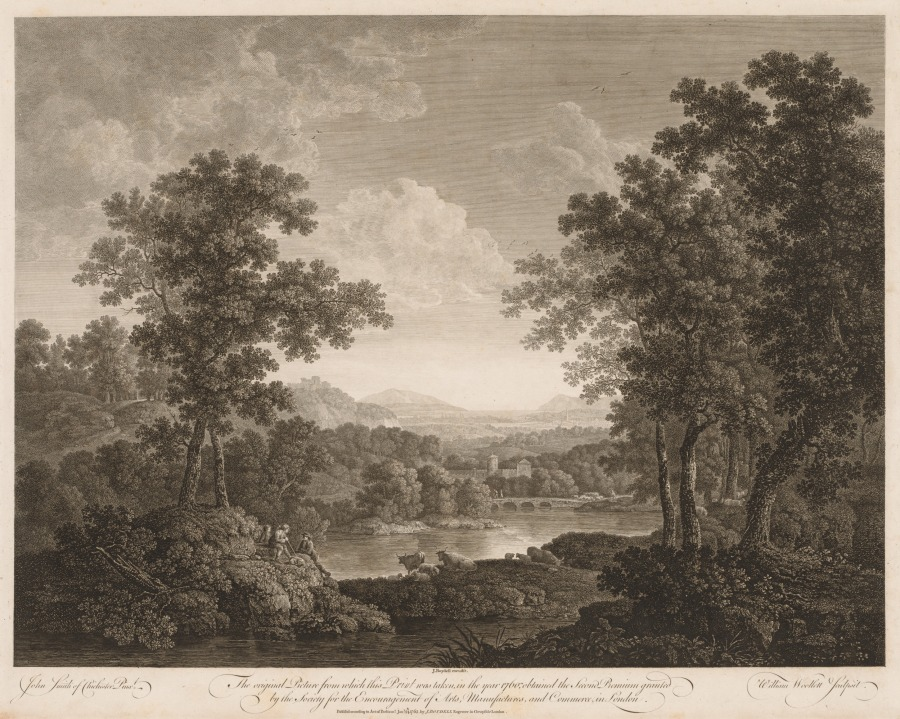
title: Landscape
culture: England, 18th century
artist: William Woollett (British, 1735–1785)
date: 1763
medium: engraving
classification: Print